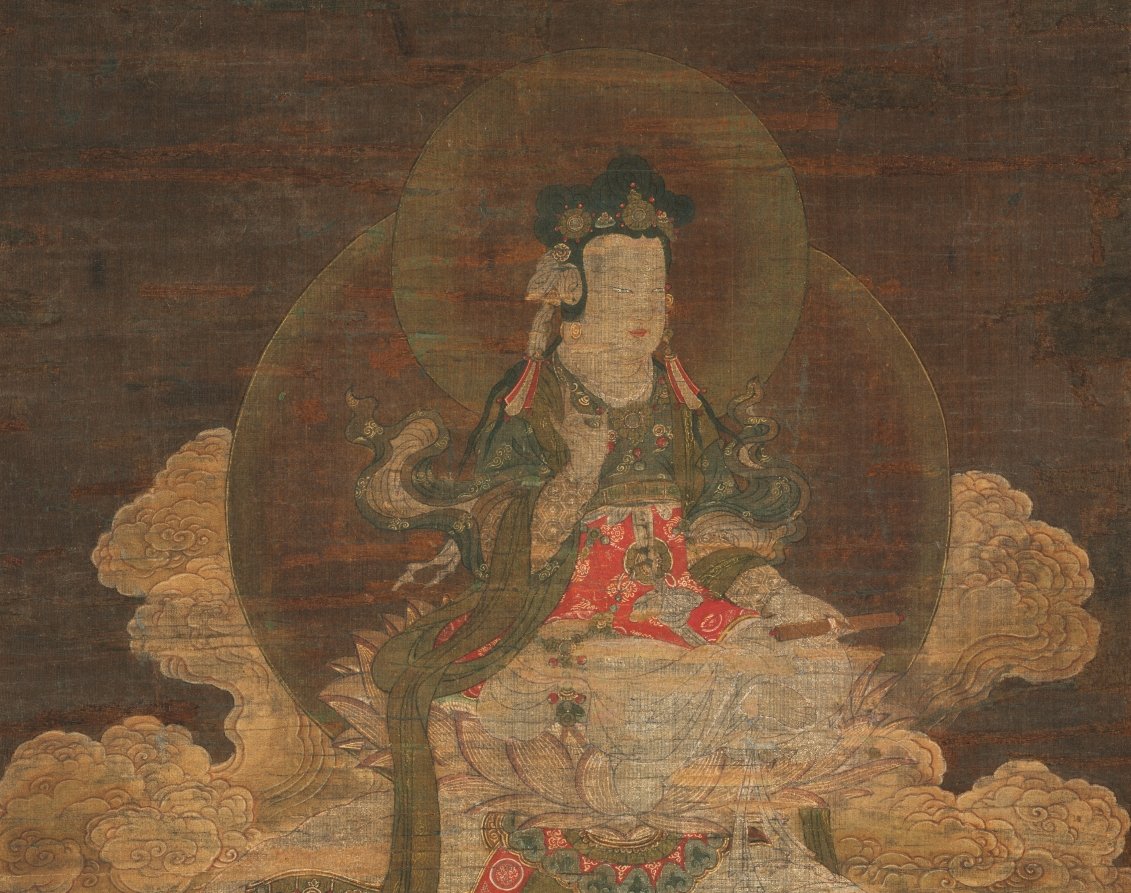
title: Shakyamuni Triad: Buddha Attended by Manjushri and Samantabhadra (Bodhisattva with Elephant)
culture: China, Fuzhou, Fujian Province, Yuan dynasty (1271-1368)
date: late 1300s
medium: Hanging scroll; ink and color on silk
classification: Painting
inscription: Inscription at the bottom of the central scroll reads: "Da Song Fuzhou fu…(Fuzhou prefecture of the great Song)."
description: This triptych is a rare example of Yuan Buddhist painting. It depicts the historic Buddha Shakyamuni flanked by two attending bodhisattvas, Manjushri (the bodhisattva of wisdom, riding a lion) and Samantabhadra (the bodhisattva of universal virtue, riding an elephant). Below them are others seeking enlightenment: two disciples of the Buddha (Ananada and Kasyapa), two non-Chinese people, a boy with topknots, and a female worshiper. The clouds above and around the divine beings form one scene that illustrates Shakyamuni’s sermon from the Lotus Sutra. This text became an important basis for Buddhist faith throughout East Asia and was central to the Mahayana school of Buddhism.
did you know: Samantabhadra, the bodhisattva of universal virtue, is mounted on a six-tusked white elephant standing on lotus flowers.